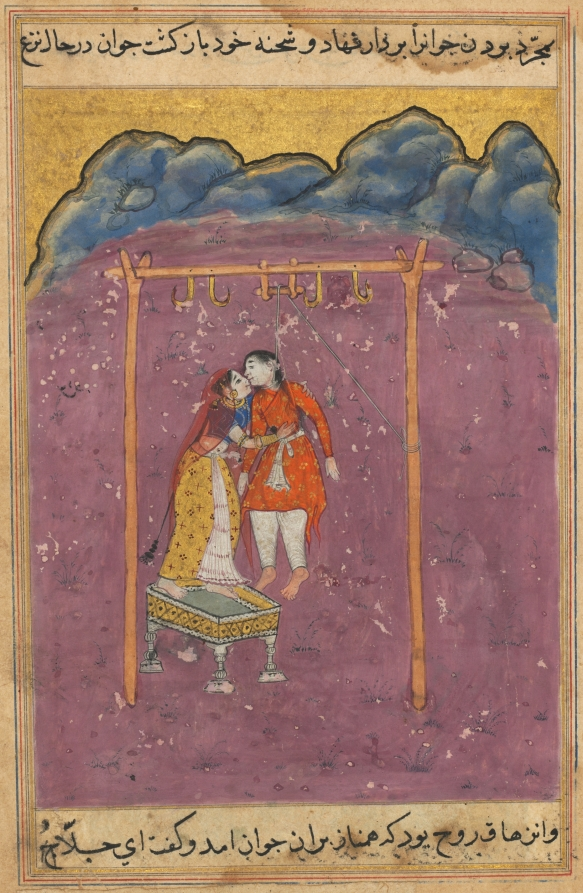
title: The lover of Hamnaz, who has been hanged from the gallows, bites off her nose when she kisses him, from a Tuti-nama (Tales of a Parrot): Twenty-fifth Night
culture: Mughal India, court of Akbar (reigned 1556–1605)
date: c. 1560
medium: gum tempera, ink, and gold on paper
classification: Painting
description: Hamnaz stands on a stool embracing her lover as he hangs. He has been put to death as punishment for being caught in their affair. Disfiguring her face serves as his final act of vengeance.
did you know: The gallows originally had four legs, discernible under infrared light.